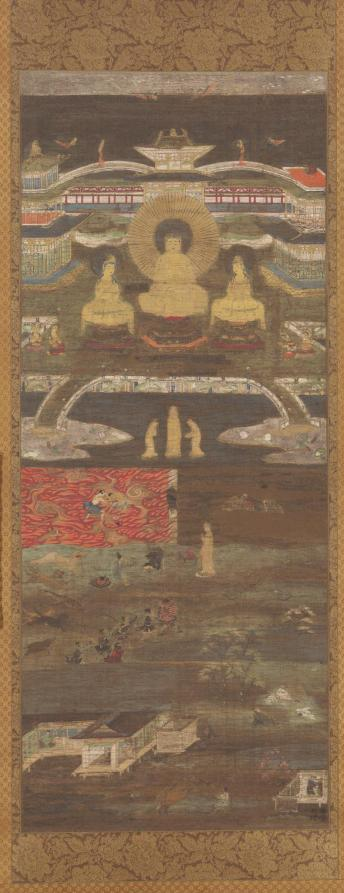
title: The White Path Between Two Rivers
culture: Japan, Kamakura period (1185–1333)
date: 1200s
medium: hanging scroll; ink, color, gold, silver, and cut gold on silk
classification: Painting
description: This painting is a visual presentation of a teaching ascribed to the Chinese Buddhist monk Shandao (善導) (613–681). It describes a challenging journey to the land of the Buddha Amida along a narrow path between a river of fire and a river of water. The story is about escaping the six paths of reincarnation—the heavens and hells, as well as the realms of humans, animals, hungry ghosts, and fierce beings. The Buddha Amida appears at the top in his Pure Land, or Western Paradise.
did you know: The Six Realms of Transmigration are the: heavenly realm, hells, human realm, animal realm, realm of hungry ghosts, and realm of fierce beings.